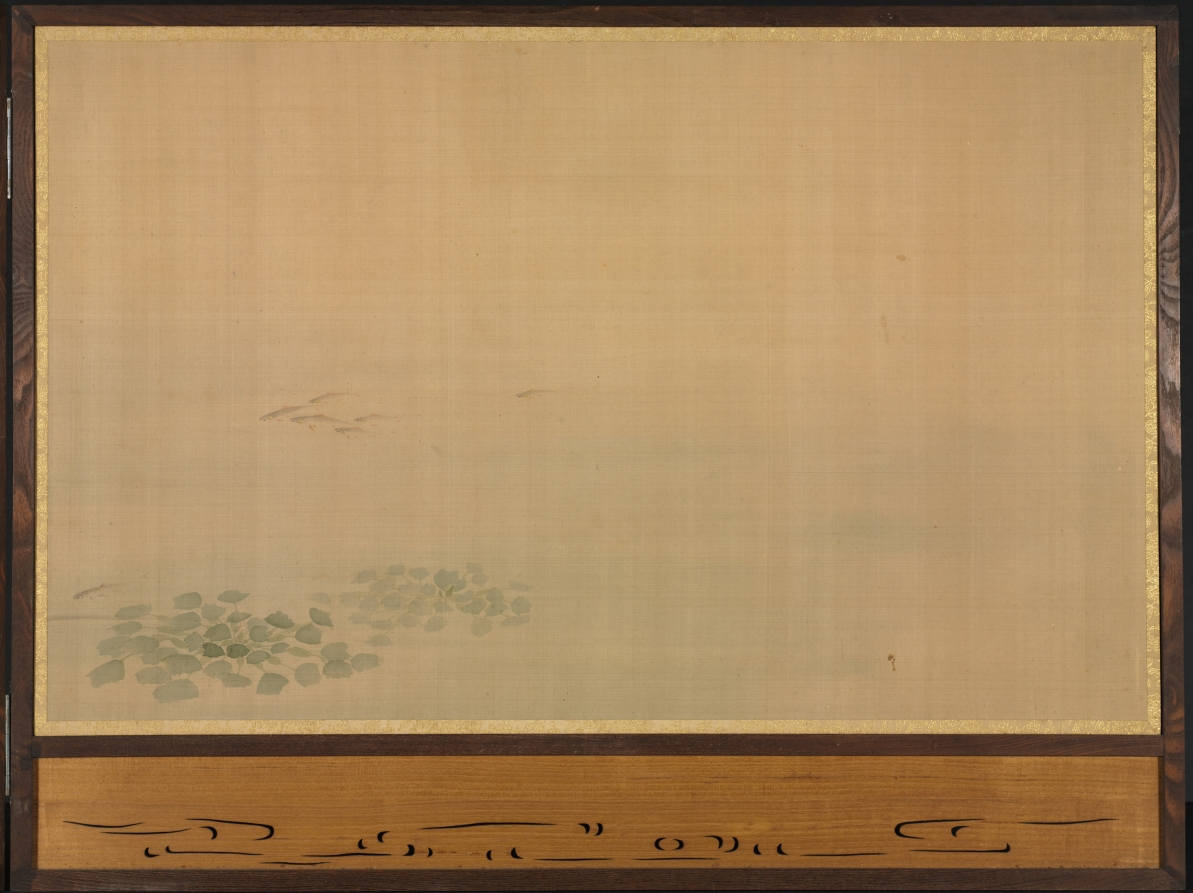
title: Fish in a Lotus Pond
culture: Japan, Edo period (1615–1868)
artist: Ōhara Donshū (Japanese, d. 1857)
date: 1800s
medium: two-fold screen; ink and color on silk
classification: Painting